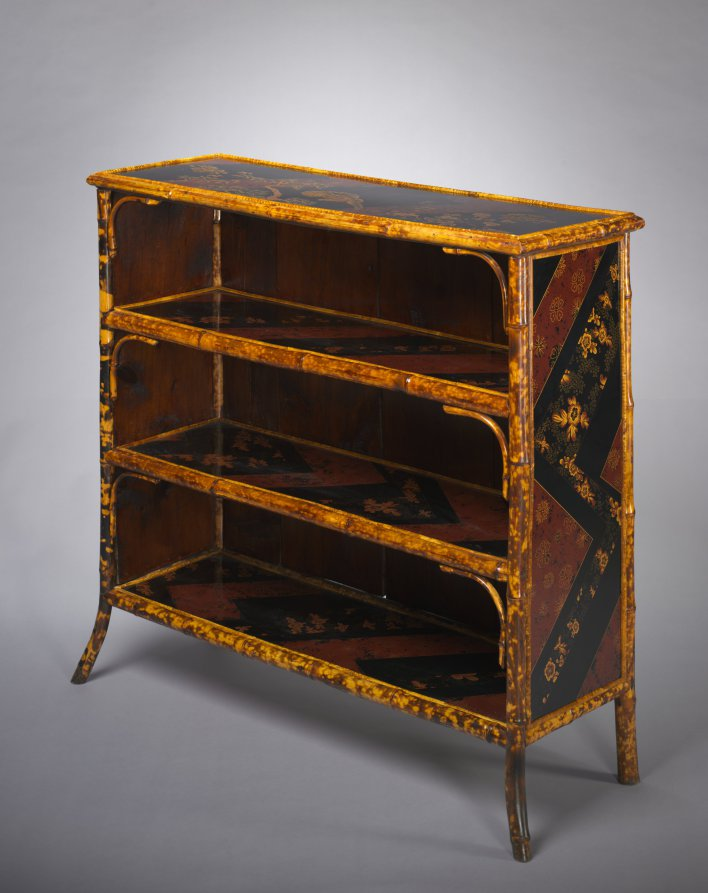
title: Bookcase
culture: France, 19th century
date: c. 1870–80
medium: bamboo with Japanese lacquer panels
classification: Wood